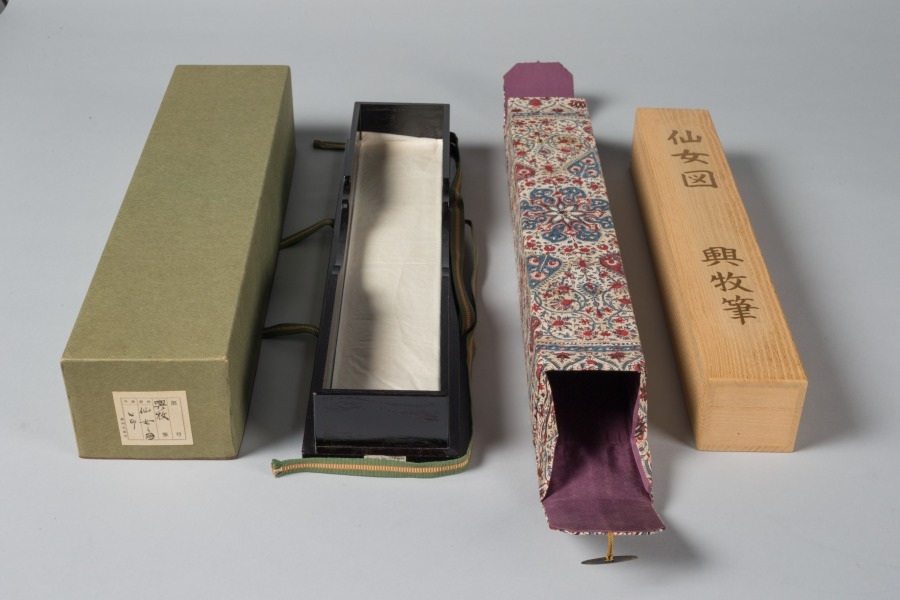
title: Female Daoist Figure in Landscape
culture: Japan, Muromachi period (1392–1573)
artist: Kōboku (Japanese)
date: early 1500s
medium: hanging scroll; ink on paper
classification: Painting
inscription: 「興牧」（朱文方印）